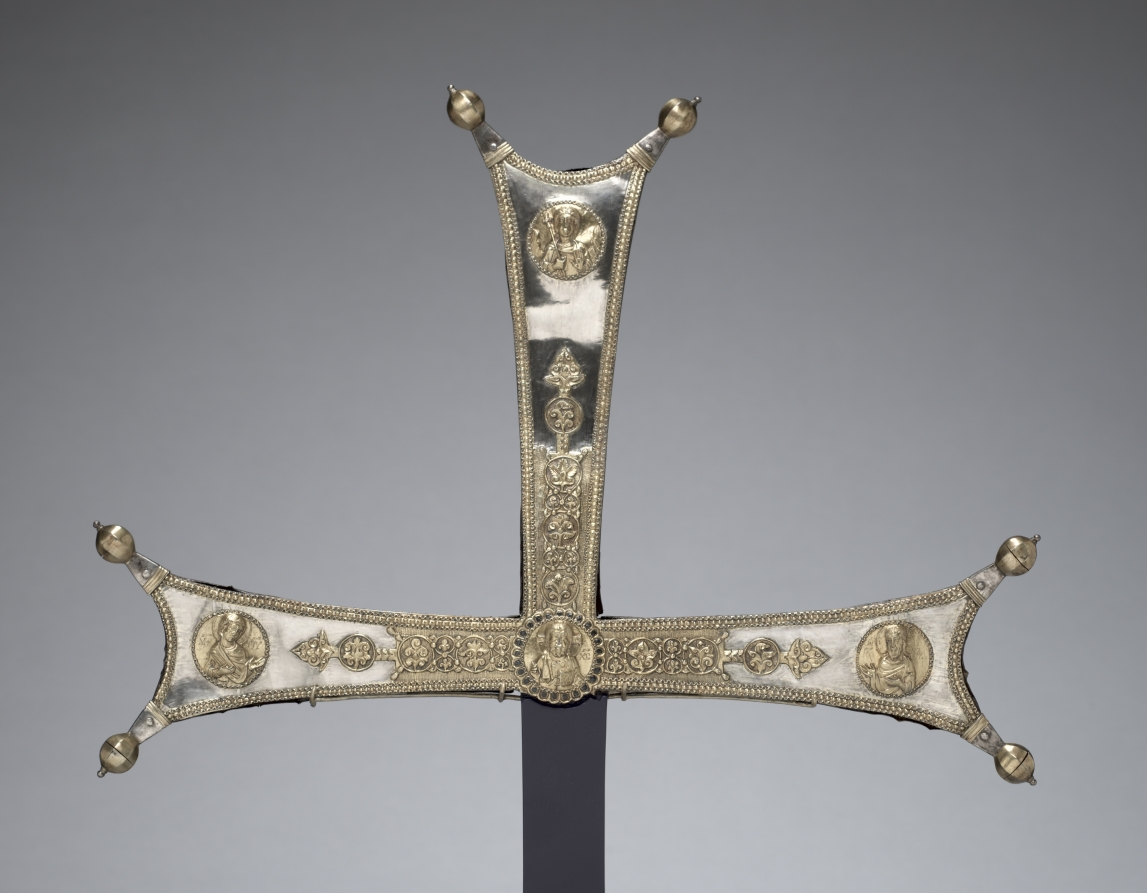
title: Fragment of a Processional Cross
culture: Byzantium, Constantinople, Byzantine period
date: c. 1050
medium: silver gilt, niello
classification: Metalwork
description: Impressively large and elaborately embellished, the cross to which this fragment belonged was likely carried in liturgical processions. The central medallion on its front depicts Christ, flanked by medallions showing the Virgin and Saint John the Baptist. Together they form the Deesis, a powerful Byzantine image formula evoking these saints’ intercession with Christ on behalf of mankind. In the central medallion on the cross’s back is Saint Sabas, founder of an important monastery near Jerusalem, in whose honor the cross was made. He is surrounded by other monastic saints, thus indicating that the cross was likely used by a monastic community.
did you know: Byzantine processions were a feast for the senses. Imagine the scent of sweet and spicy incense wafting through the air, mingling with the sound of sacred chants as priests carry this cross in a procession during the service.